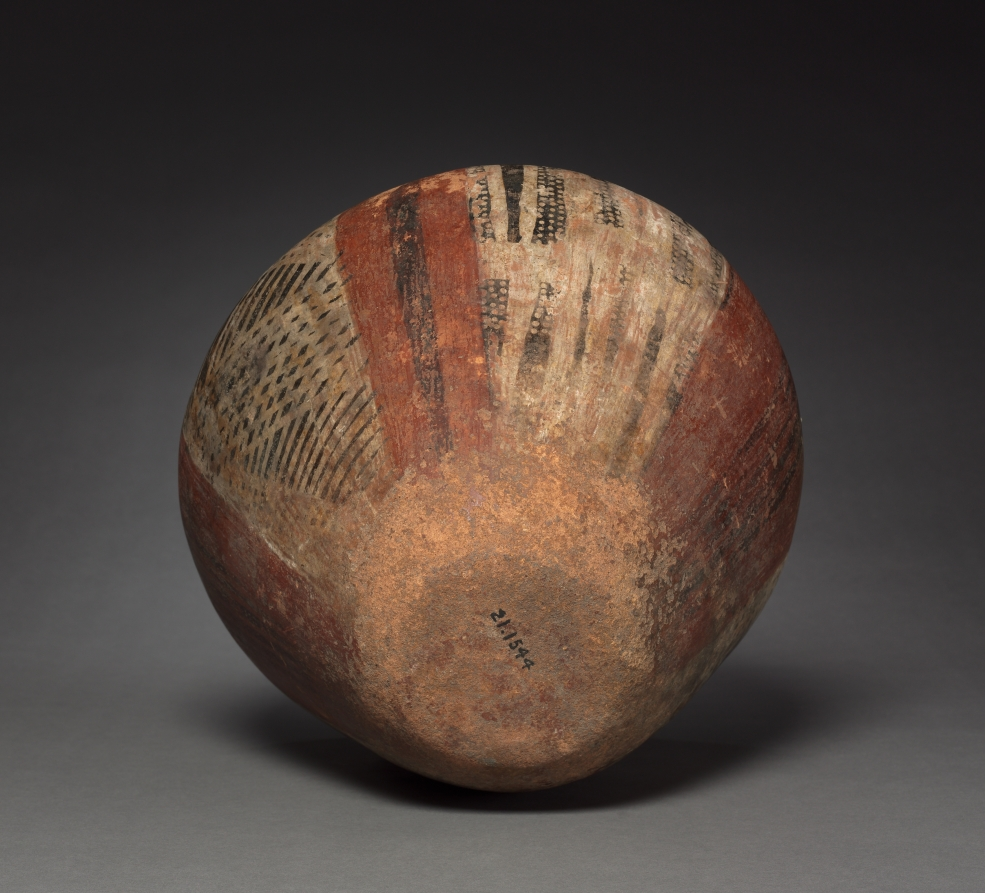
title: Jar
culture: Colombia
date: before 1550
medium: pottery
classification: Ceramic